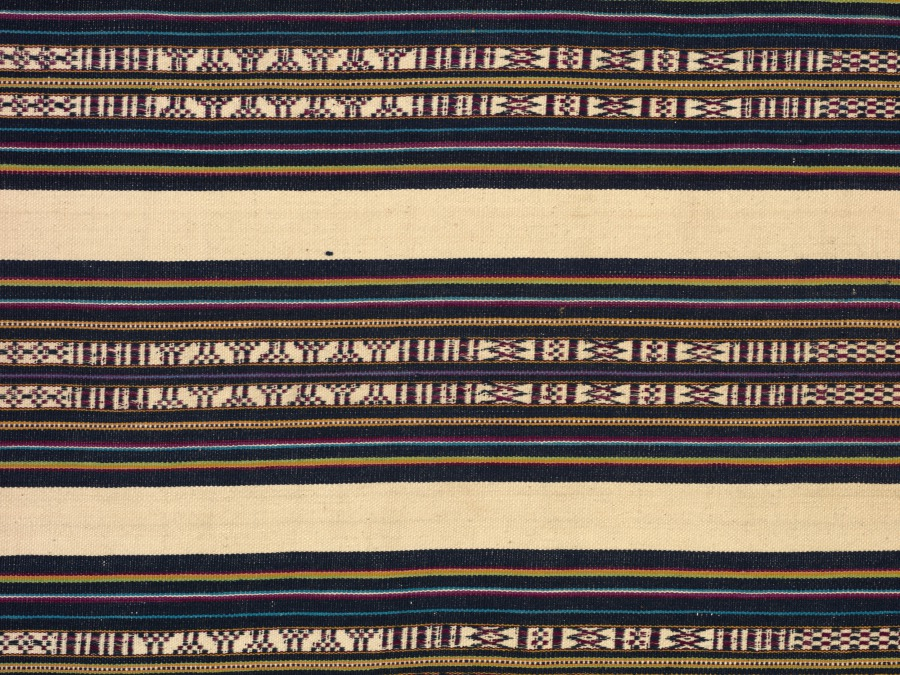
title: Textile Hanging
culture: Tibet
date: 1900–1915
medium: wool and cotton: warp faced plain weave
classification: Textile